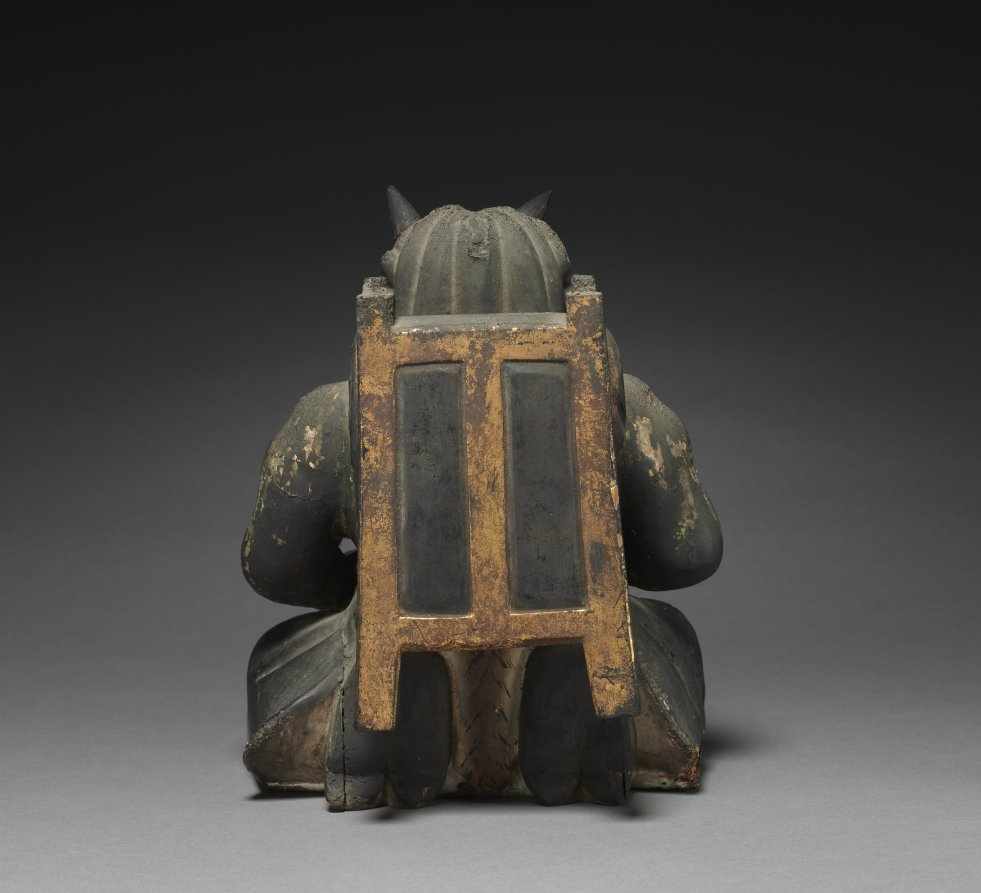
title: Seated Koki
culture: Japan, Muromachi period (1392–1573)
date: 1400s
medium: wood with pigment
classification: Sculpture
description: The axe-wielding red Zenki, and the vase-holding, bamboo backpack-wearing green Koki are both under the mystical control of the monk, En no Ozunu (legendarily 634–701), also known as En no Gyōja, or “En the Ascetic,” considered to have founded Shugendō, a style of religious practice focused on performing austerities in mountainous settings.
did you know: This sculpture was hand-carved and covered with gesso, then paint in green, white, red, yellow, orange, and black, and gilded in select areas.